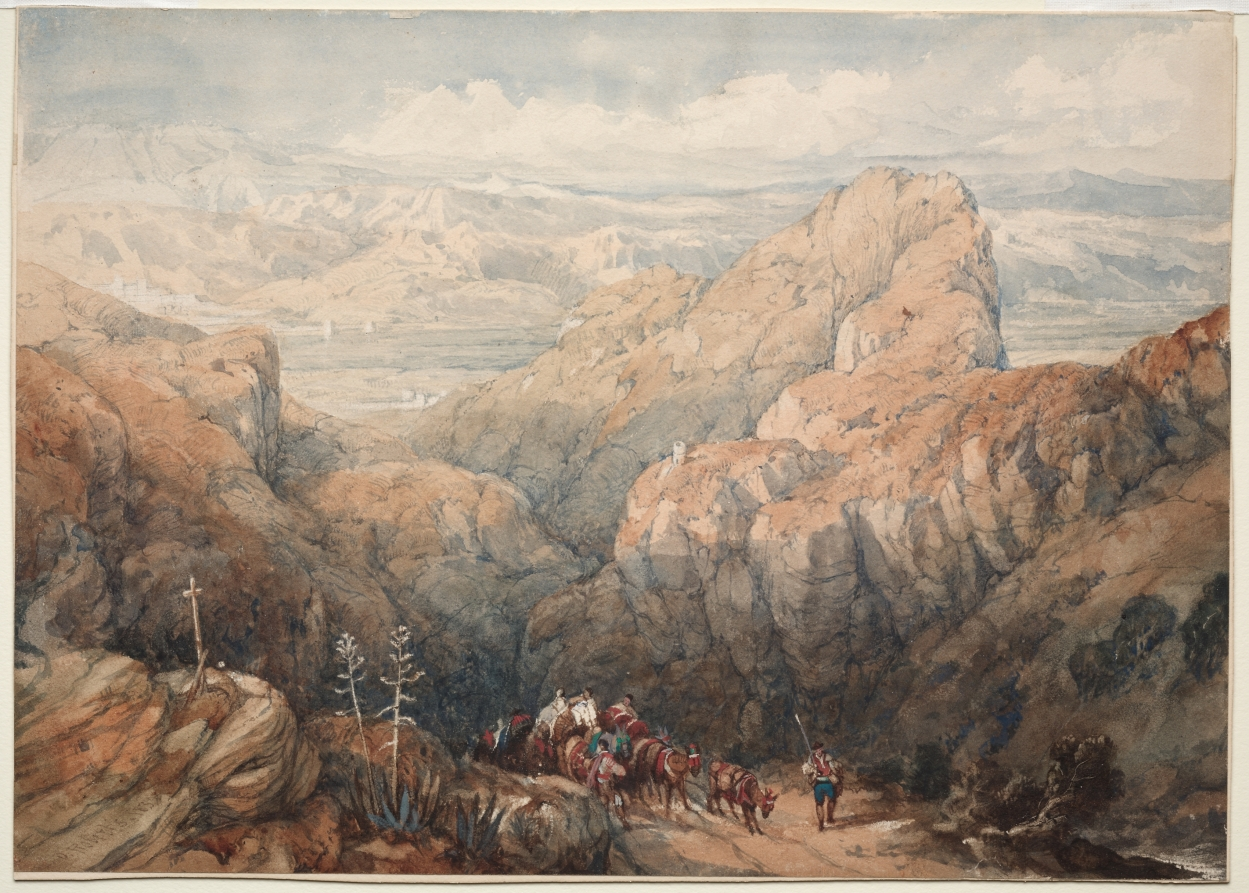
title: Descent into the Plain of Granada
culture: England, 19th century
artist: David Roberts (Scottish, 1796–1864)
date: 1834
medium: watercolor with gouache, scratch-away, and graphite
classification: Drawing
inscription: signed and dated, in brown watercolor, at lower left: D. Roberts 1834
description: Later celebrated for his topographical landscapes of the Middle East, David Roberts’s first extended trip abroad was in 1832 when he traveled through France to Spain over a period of 10 months. This watercolor records a scene from Roberts’s journey from Madrid to Andalusia. He described the trip in a letter to his sister: "I jogged on a considerable part of the way on foot, happy and contented. Granada is in the most beautiful situation that can be imagined. It lies at the foot of a ridge of high mountains, called the Sierra Nevada, or the Mountains of Snow." Replete with burdened mules, a lone figure on foot, and sun-drenched mountains with a view of Granada in the distance, this watercolor vividly illustrates the artist’s recollections.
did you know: This drawing was reproduced as a wood engraving in Roscoe's first volume, The Tourist in Spain: Granada.